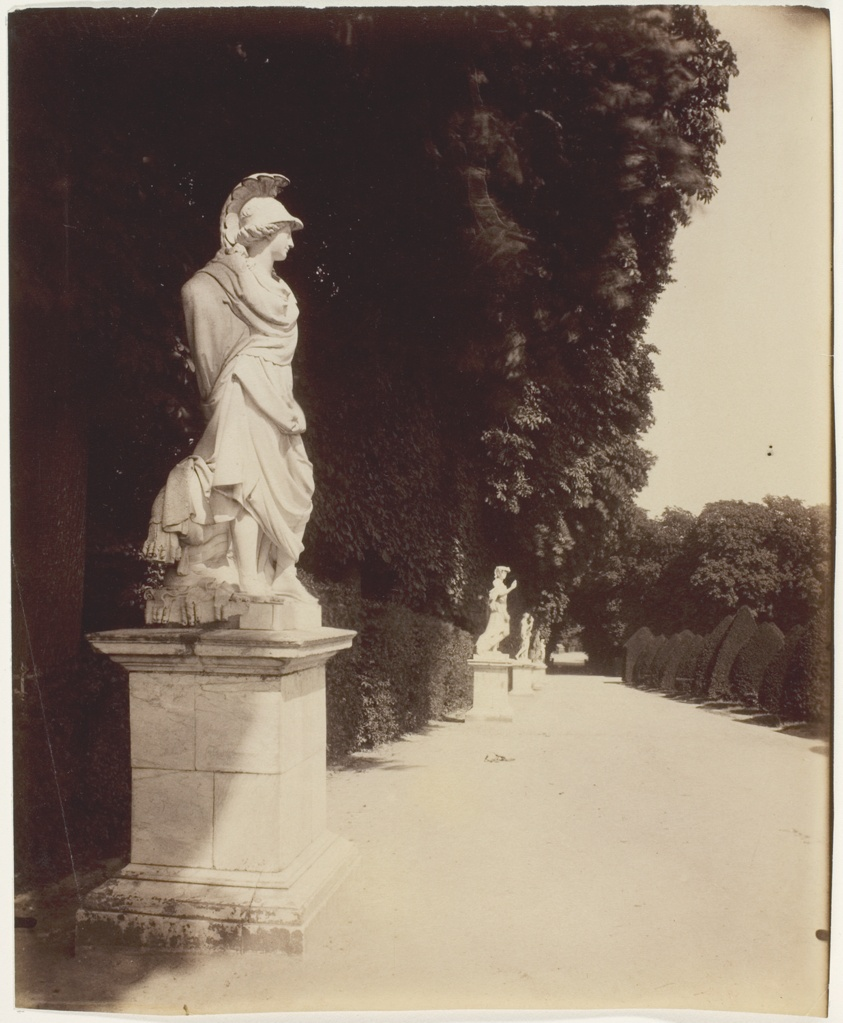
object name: Photograph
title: Versailles, Coin de Parc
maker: Jean-Eugène-Auguste Atget (French, 1857–1927)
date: 1903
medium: Albumen print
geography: France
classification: albumen silver print; photographic process; photography; photograph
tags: Collected by Hugh Edwards